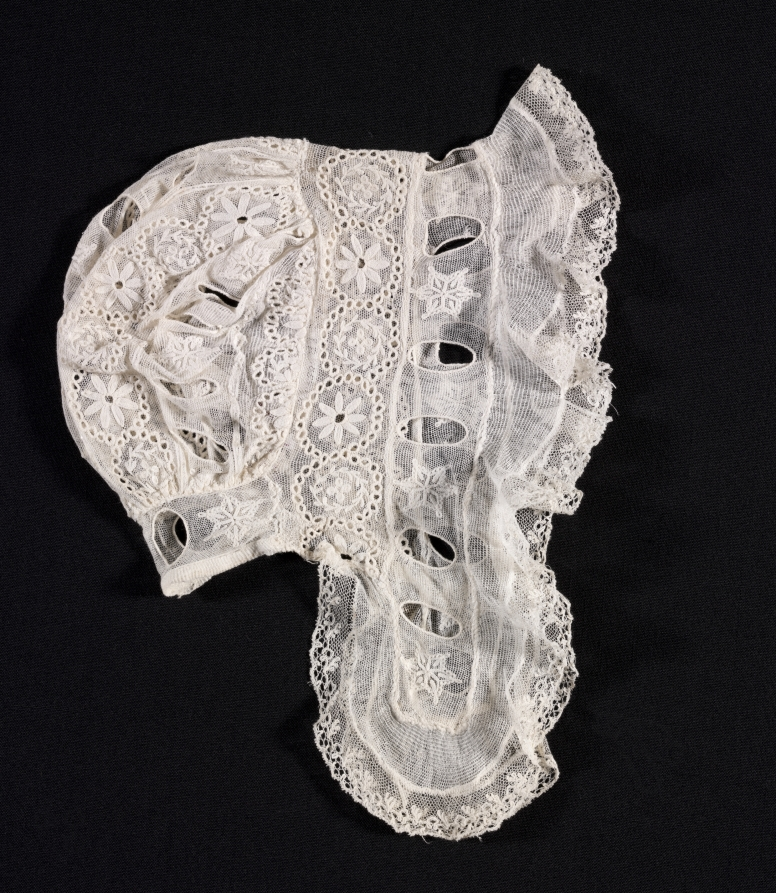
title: Lace Bonnet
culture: Germany, Frankfurt, Early 20th Century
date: 1900–1925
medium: Machine-made net lace with embroidery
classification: Garment